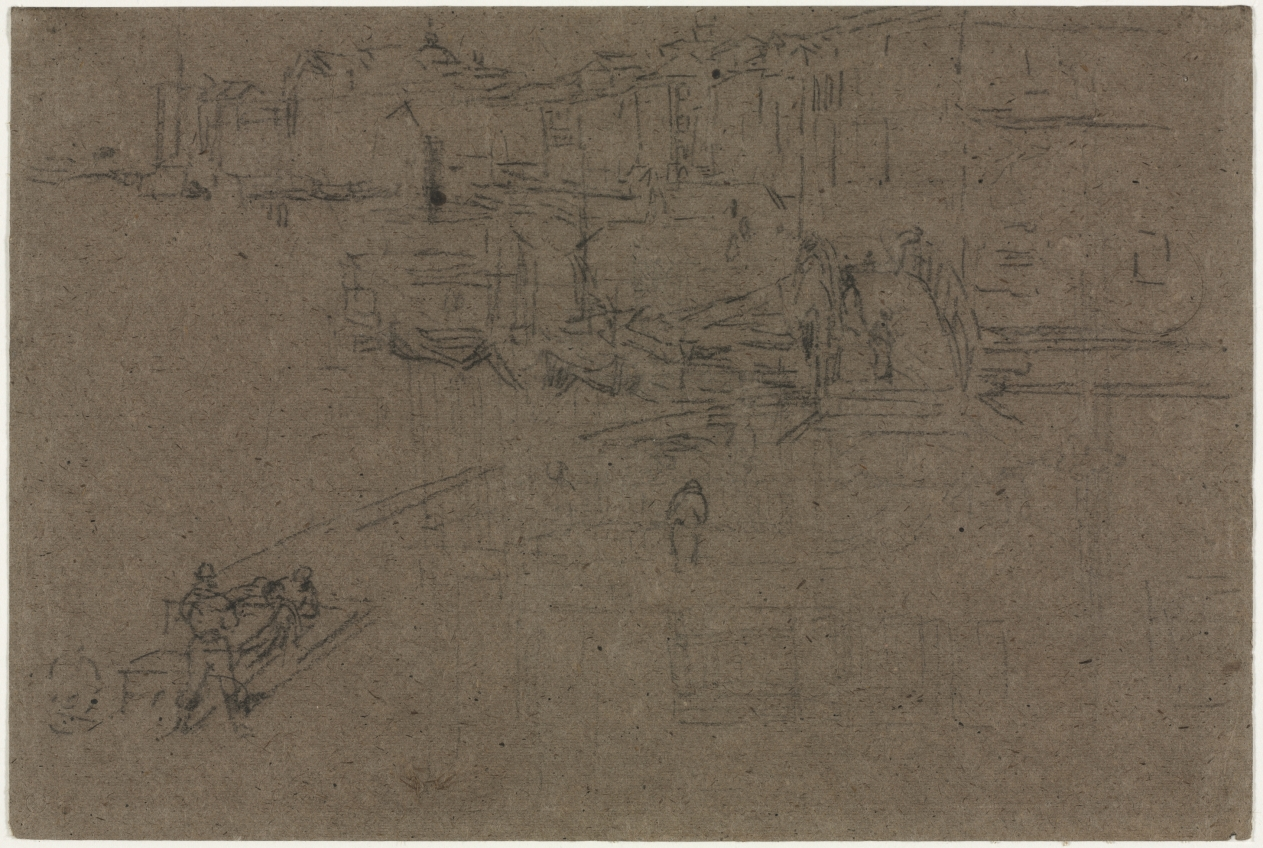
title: The Riva, Venice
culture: America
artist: James McNeill Whistler (American, 1834–1903)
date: 1879–80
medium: charcoal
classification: Drawing